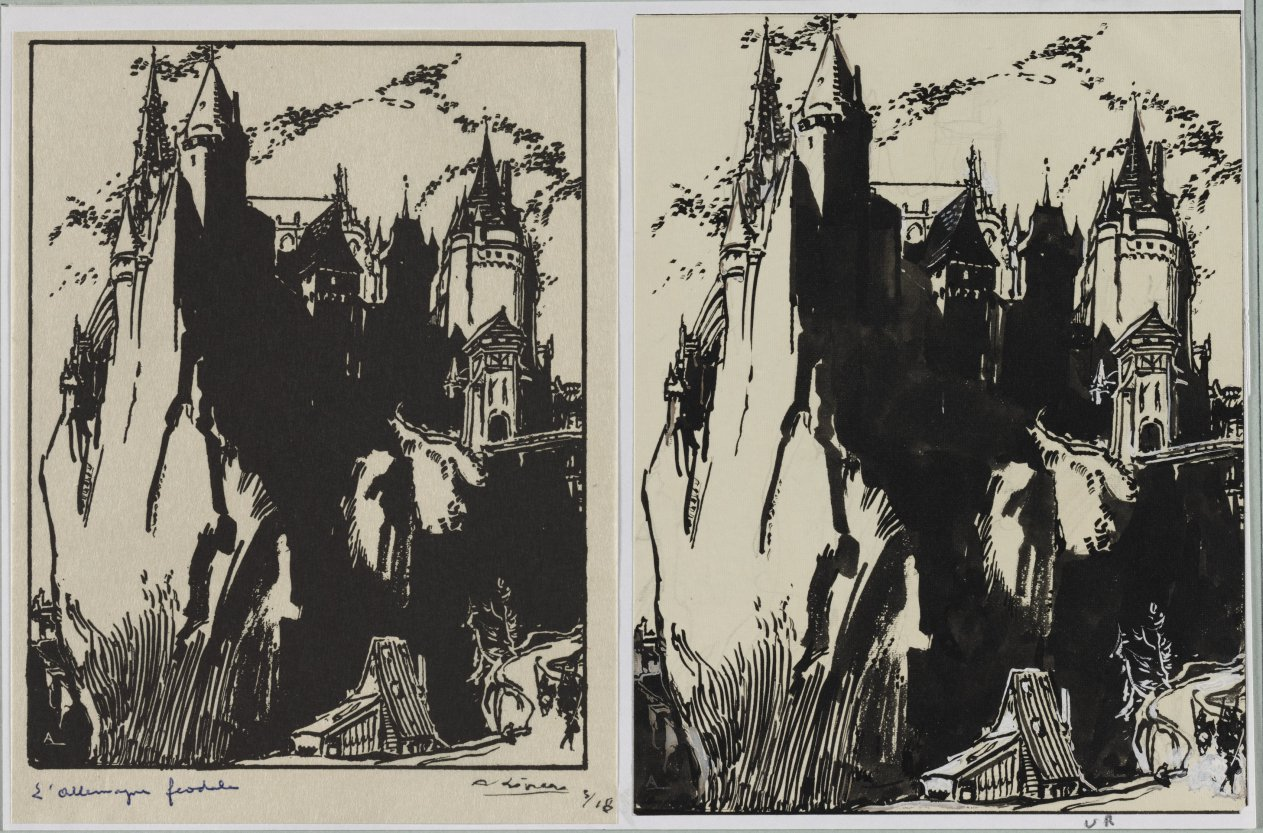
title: L'Allemagne feedale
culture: France, 20th century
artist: Auguste Louis Lepère (French, 1849–1918)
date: 1914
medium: brush and black ink over pencil with white highlights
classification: Drawing